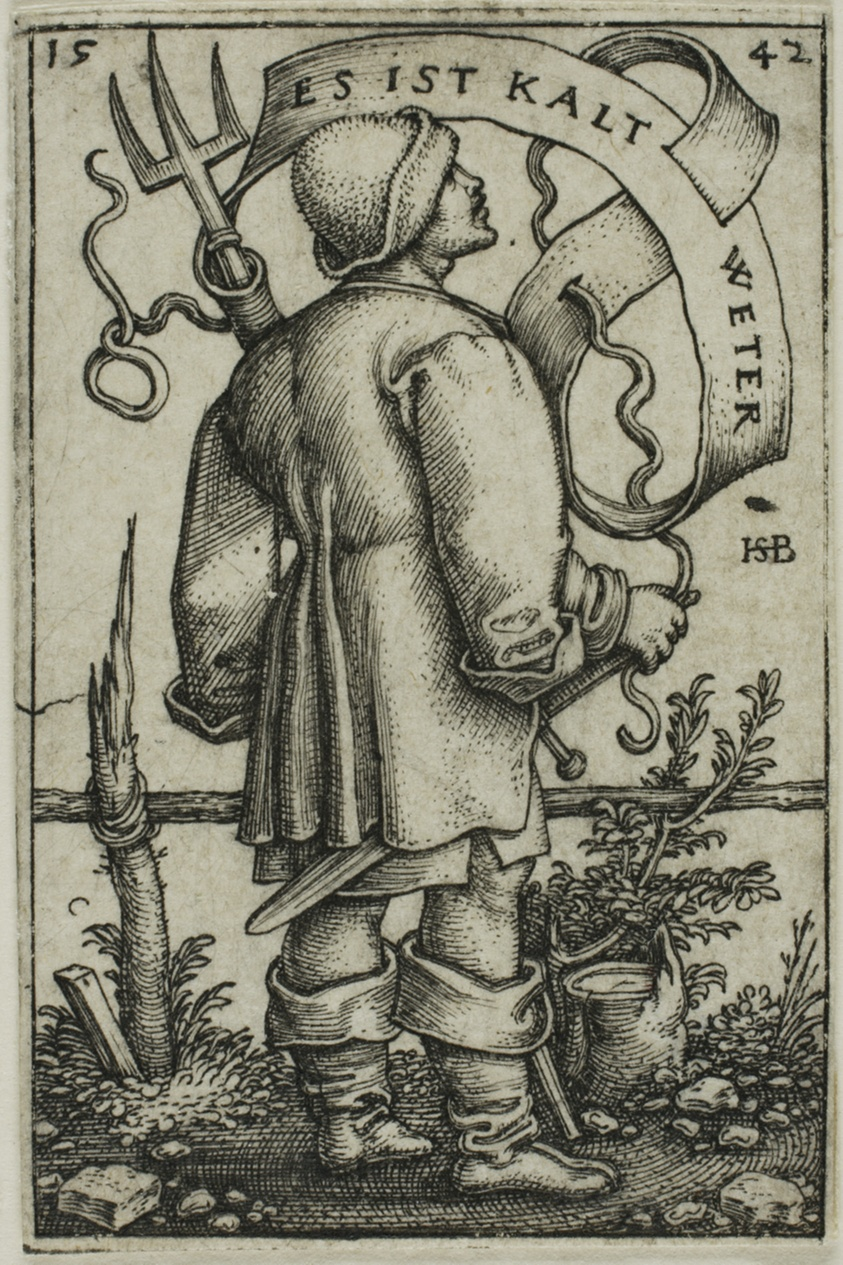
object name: Print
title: The Weather-Peasant "Es Ist Kalt Weter"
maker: Sebald Beham; German, 1500-1550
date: 1542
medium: Engraving in black on ivory laid paper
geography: Germany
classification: engraving; print; prints and drawing